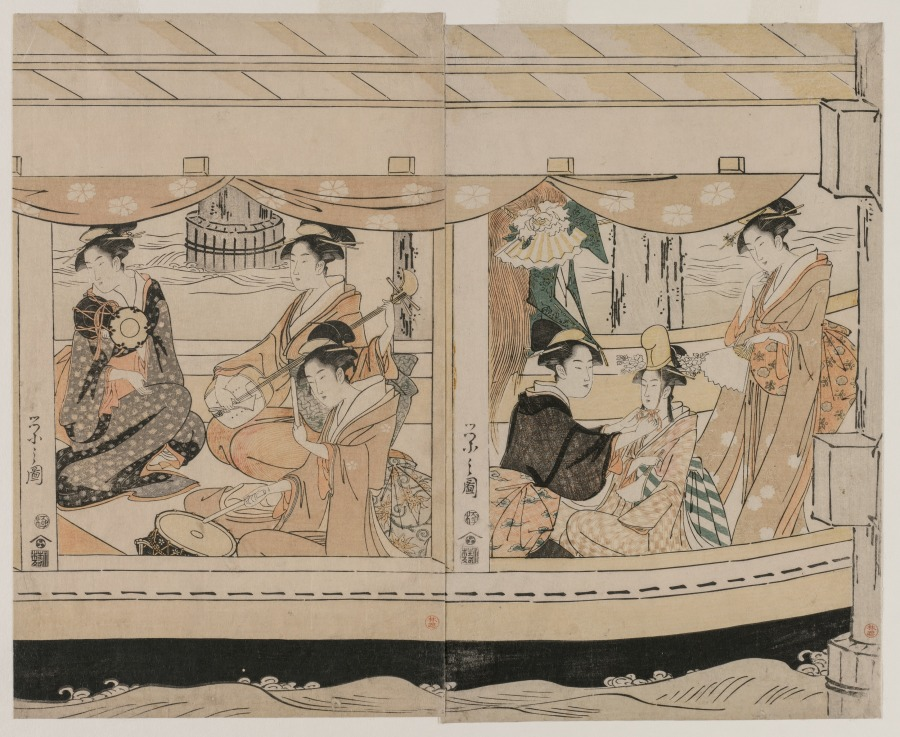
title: Party on the Pleasure Boat Kawaichimaru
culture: Japan, Edo period (1615–1868)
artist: Chōbunsai Eishi (Japanese, 1756–1829)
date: c. 1796–97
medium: Pentaptych of woodblock prints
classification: Print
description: A pleasure boat named Kawaichimaru is filled with entertainers in this expansive scene. At the vessel’s right end, a young dancer waits as her costume’s hat is arranged. In the middle, a trio of musicians performs, two on drums and another on shamisen, a three-stringed instrument. Listening to them is an elegant woman smoking her pipe. At the left end, three women, one on a neighboring boat, enjoy a spectacular floral arrangement of pine, lily, and iris on a lacquer stand.